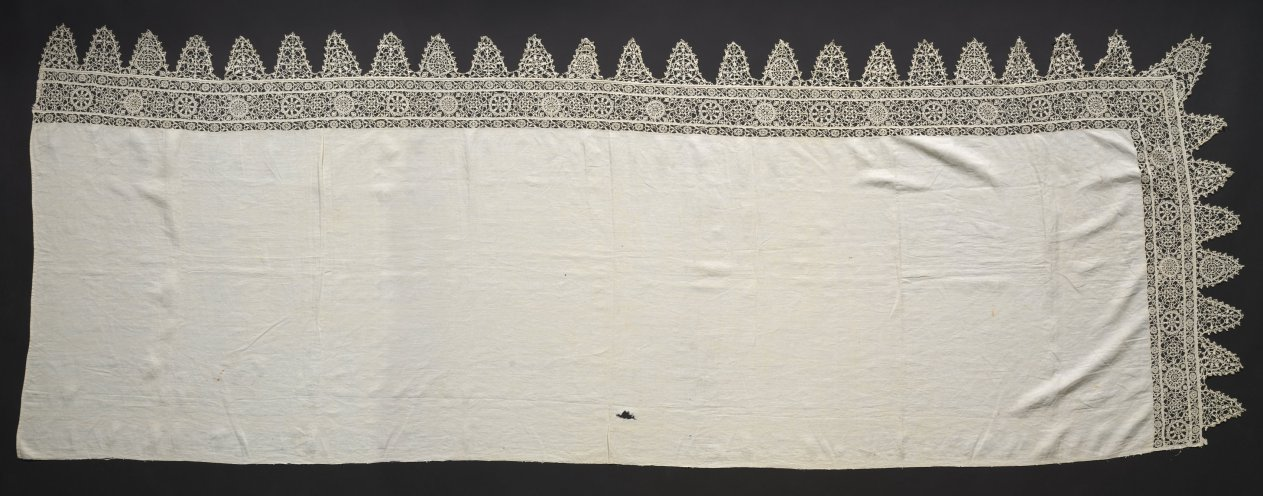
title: Cloth with Lace Edging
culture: Italy, Genoa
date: 1600s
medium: linen: needlepoint lace (reticella) top of linen sheet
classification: Lace